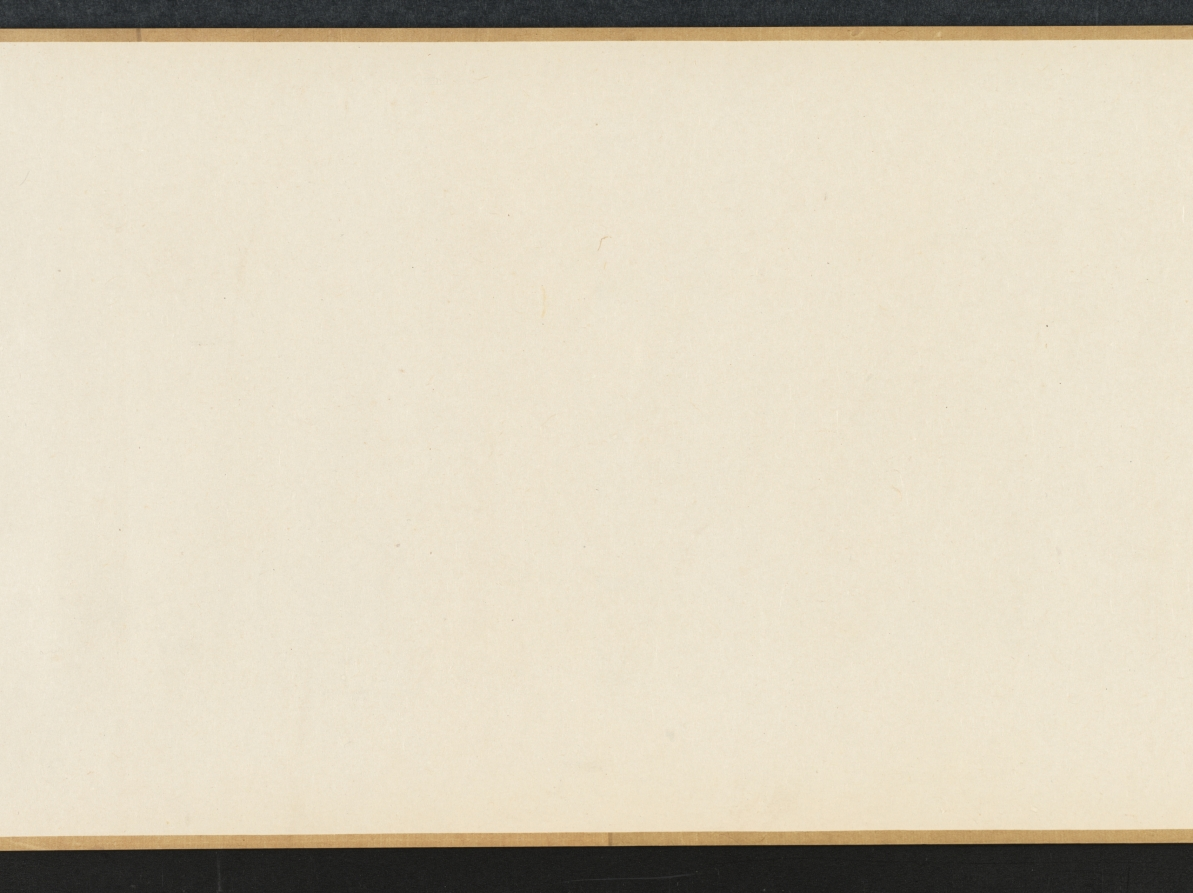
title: The Lantern Night Excursion of Zhong Kui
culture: China, Yuan dynasty (1271-1368)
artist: Yan Hui (Chinese, active 1270–1310)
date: late 1200s–early 1300s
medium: handscroll; ink and slight color on silk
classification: Painting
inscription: Artist's signature [and probable seal]: Yan Qiuyue 顏秋月 Title on frontispiece and 1 seal of Niu Shuyu 鈕樹玉 (1760–1827): Qiuyue mohuan 秋月墨幻 [Qiuyue's Ink Fantasy]. 31 additional seals: 2 of Yang Shiqi 楊士奇 (1365–1444); 2 of An Guo 安國 (1481–1534); 8 of Xiang Yuanbian 項元汴 (1525–1590); 2 of Geng Zhaozhong 耿昭忠 (1640–1686); 4 of Pu Tung 溥侗 (1870–1952); 7 of Tan Jing 譚敬 (1911–1991); 1 of Liu Ting-chih (20th c.); 5 unidentified.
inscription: An inscription by Zizhi Shanren 紫芝山人 [probably Jiang Hui 蔣惠], dated 1389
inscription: An inscription by Wu Kuan 吳寬 (1436–1504)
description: Here, the demon queller Zhong Kui leads a nightly procession of street entertainers with bare, muscular bodies and demonic faces. Some wear shabby clothes, and all perform stunts and tricks to astound and scare the viewer. In fact, a New Year custom in cities of southeast China had the poor, disguised as demons, process through the streets and play their tricks to clear households of evil spirits and welcome the spring. From right to left, a demonic figure leads the procession and beats a drum; another lifts a large rock; one stands on his hands trying to drink; one balances a jar on his elbow; three hold and wield weapons; one carries a folded chair covered by a cow’s skin; another holds Zhong Kui’s qin (zither), books, brush, and inkstone. At the end of the scroll, two figures offer a cup and bottle of wine to Zhong Kui, who lifts his hand in command.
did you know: Zhong Kui was an ancient ghostbuster.